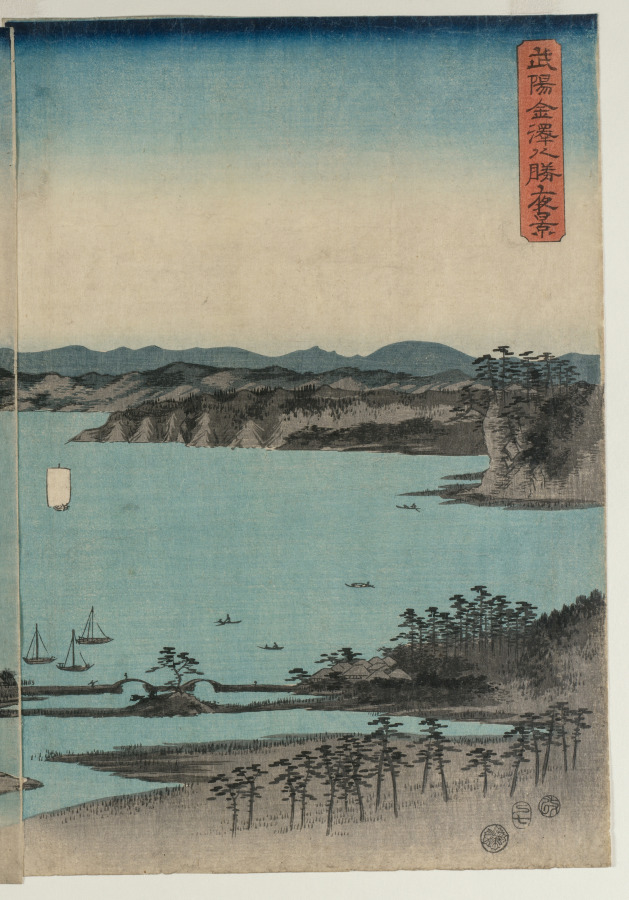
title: Full Moon on Kanazawa, Musashi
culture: Japan, Edo period (1615–1868)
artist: Utagawa Hiroshige (Japanese, 1797–1858)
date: 1857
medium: One of a triptych of color woodblock prints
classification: Print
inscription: Signature: Hiroshige hitsu (left panel). Artist Seal: Ichiryusai. Publisher: Okazawaya Taheiji. Censorship seal: aratame.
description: Late in his career, Hiroshige explored the poetic theme of setsugekka, “snow, moon, and flowers,” in a set of three triptychs. This panoramic scene shows the autumn moon over Kanazawa, near Tokyo. Hiroshige’s contemporaries would have recognized the coastline dotted with villages, fishing boats, and the distinctive double-arched bridge at the bottom right.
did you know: The red cartouche on the right gives the title of the print.